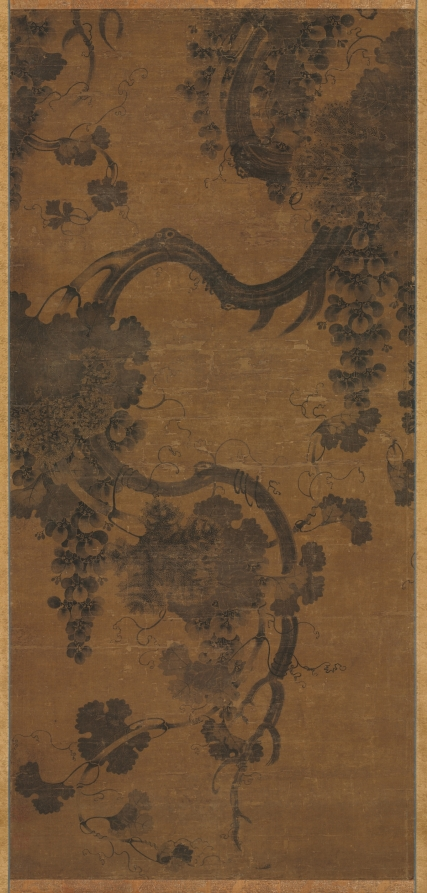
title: Grapes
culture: Korea, Joseon dynasty (1392–1910)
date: 1700s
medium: hanging scroll, ink on silk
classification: Painting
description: Grapes began to be employed as artistic motifs in Korean art after their introduction to the peninsula around the 600s through the Silk Road, the ancient global trade route. Artists used them to embellish the surfaces of mother-of-pearl lacquer boxes and blue-and-white porcelain, while scholar-poets composed poems about the luscious sweet sourness of green grapes. Grape paintings such as this were hung on a wall especially in a scholar’s elegant study during the summer season when deep blue grapes ripen.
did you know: Grape wine was introduced to the Korean court in the 1200s, but the common classes did not have many opportunities to enjoy it until the 20th century.